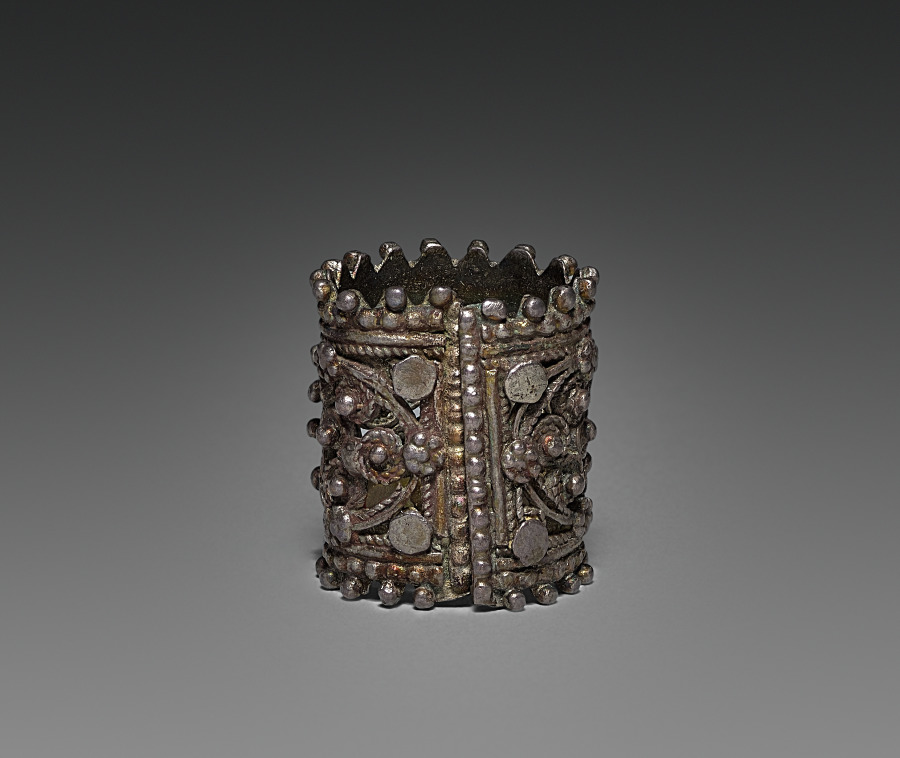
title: Ring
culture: India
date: early 1900s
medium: silver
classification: Jewelry